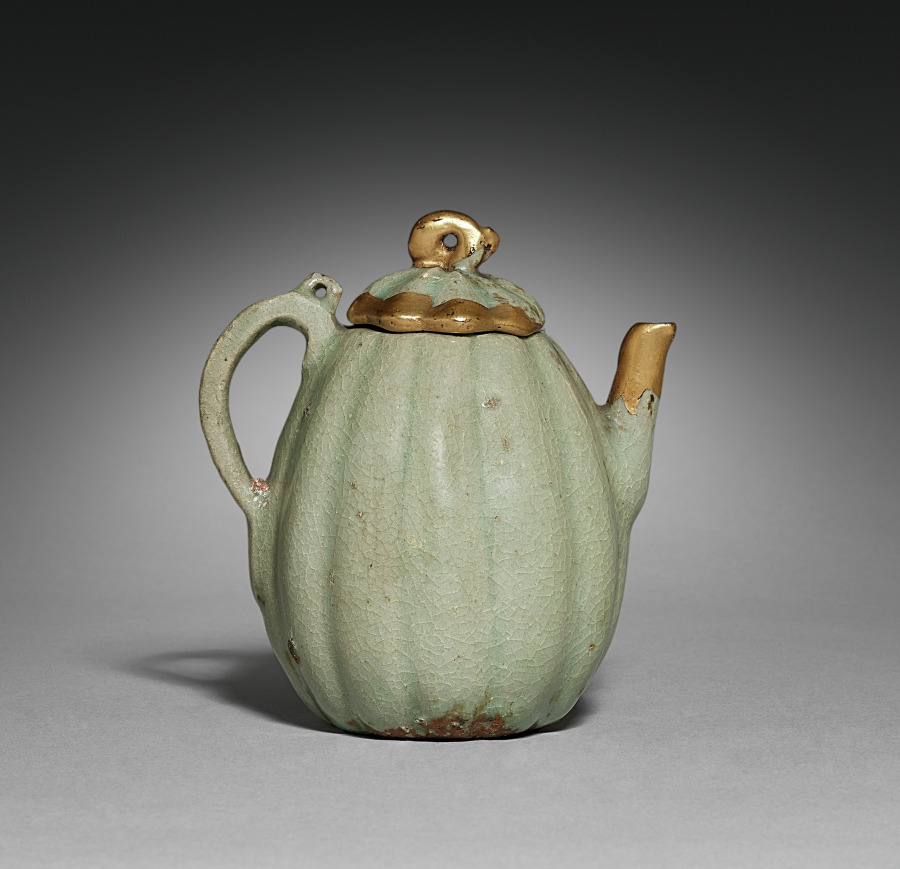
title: Melon-shaped Wine Ewer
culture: Korea, Goryeo dynasty (918–1392)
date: 1100s-1200s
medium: celadon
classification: Ceramic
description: Many celadon ceramics, such as these two miniature pots, have been repaired with gold lacquer. Termed kintsugi (literally meaning “gold joinery”) in Japanese, this restoration method highlights broken parts with glittering gold mixed with lacquer. Initiated in Japan in the 1400s, the technique follows a popular aesthetic concept called wabi-sabi, which finds beauty in imperfect things. Goryeo celadons were considered rare treasures among Japanese collectors in the early 1900s; thus, their broken condition is brilliantly highlighted in gold lacquer, as seen here in the repaired spouts, handle, and lid.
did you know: This miniature wine pot was buried in a tomb for the soul of the deceased.